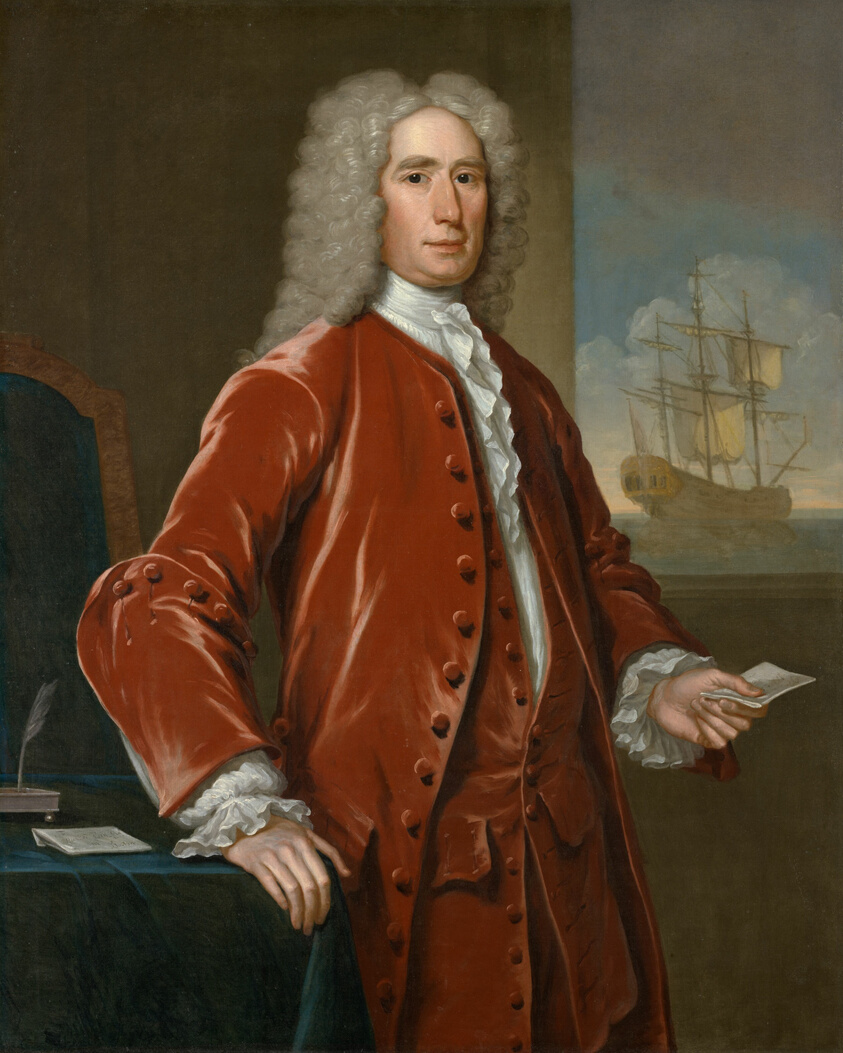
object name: Painting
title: Richard Bill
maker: John Smibert (American, born Scotland, 1688–1751)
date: 1733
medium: Oil on canvas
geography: United States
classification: painting; american arts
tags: fashion, people, portraits